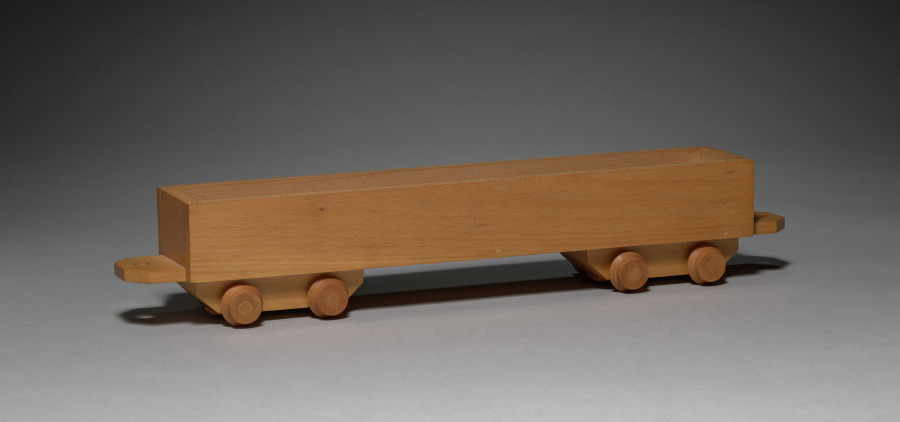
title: Train Car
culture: Denmark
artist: Boysen Toys (Danish)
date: 1900s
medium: wood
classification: Wood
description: Credit line: John D. Rockefeller General Education Board Grant II